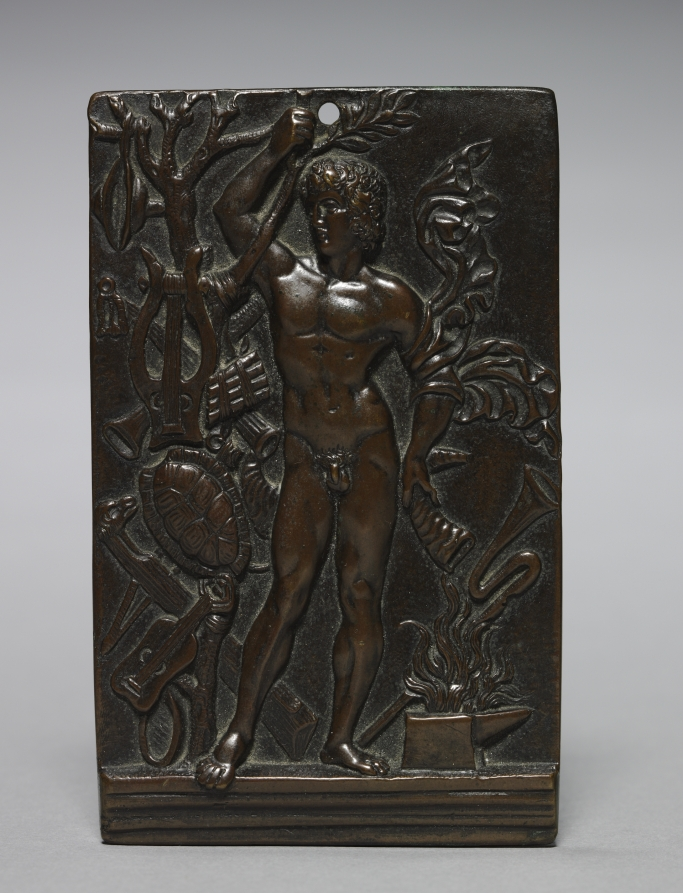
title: Allegory of Music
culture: Northern Italy, 16th century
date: c. 1500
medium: bronze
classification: Sculpture